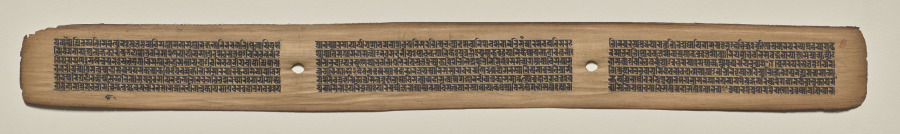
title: Text, Folio 116 (recto), from a Manuscript of the Perfection of Wisdom in Eight Thousand Lines (Ashtasahasrika Prajnaparamita-sutra)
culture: Eastern India, Bihar, Vikramashila Monastery. Painting: Nepal, Kathmandu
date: Sunday, September 14, 1119 (year 239 of the Newar Samvat in the month of Ashvina)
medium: gum tempera and ink on palm leaves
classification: Painting